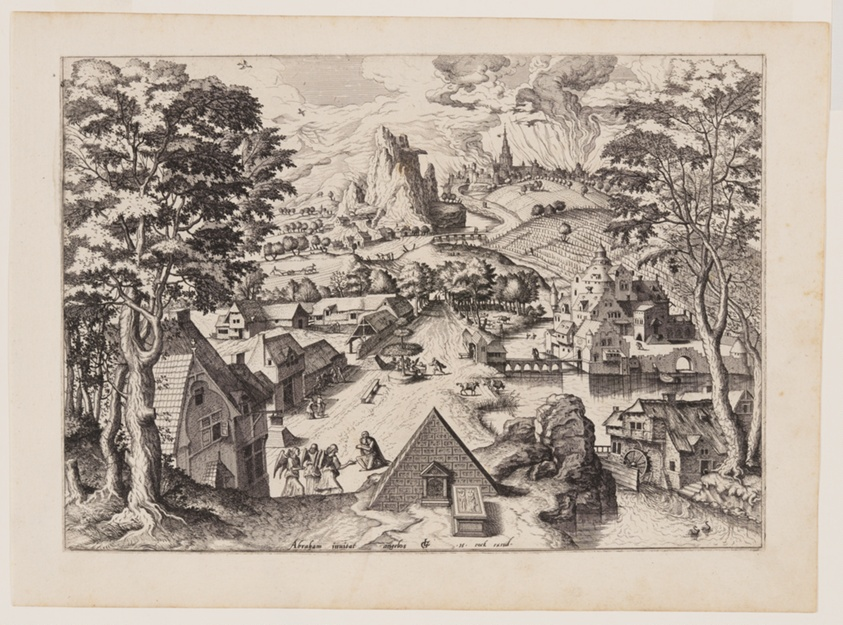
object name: Print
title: Abraham Entertaining Angels, from Landscapes with Biblical Subjects and Saints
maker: Johannes van Doetecum (Netherlandish, 1528/32–1605) and Lucas van Doetecum (Dutch, died before 1584); after Lucas Gassel (Netherlandish, c. 1485-c. 1568)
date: c. 1562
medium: Etching on ivory laid paper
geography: Netherlands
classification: etching; paper; print; prints and drawing